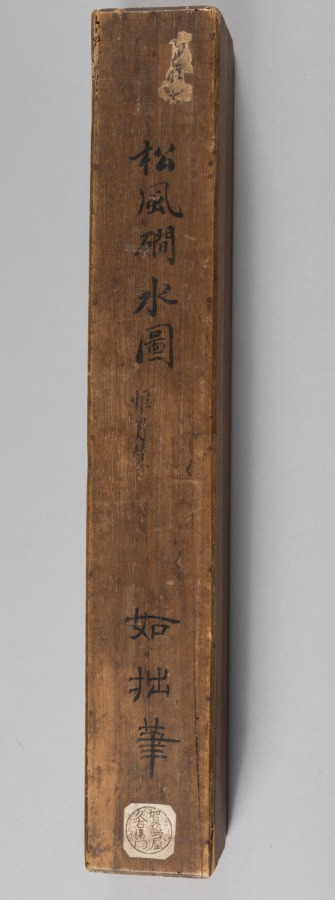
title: Landscape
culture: Japan, possibly Edo period (1615-1868)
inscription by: copy after Ishō Tokugan (Japanese, c. 1359–1437)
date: early 1600s to mid-1800s?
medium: hanging scroll; ink and slight color on paper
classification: Painting